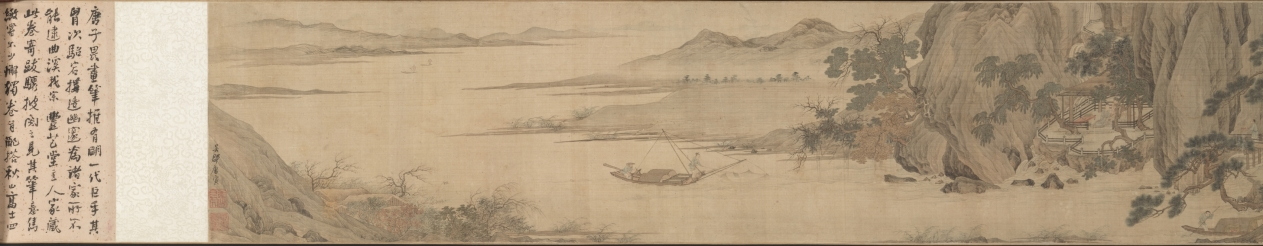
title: Scholar-Hermits in the Autumn Mountains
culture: China, Ming dynasty (1368–1644)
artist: Tang Yin (Chinese, 1470–1523)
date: 1500–1510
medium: handscroll, ink and light color on silk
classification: Painting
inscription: Artist's signature and 2 seals at end of scroll: Tang Yin [seals] T'ang Po-hu; T'ang Tzu'wei t'u-shu.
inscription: Title on frontispiece by Li Cho-kung (dates unknown).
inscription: 1 colophon and 11 additional seals: 1 colophon dated 1915 of Wu Tso-hsi (19th-20th c.); 2 seals of Gao Qifeng 高奇峰 (1889–1933); 5 seals of C. C. Wang 王季遷 (1907–2003); 4 seals unidentified.